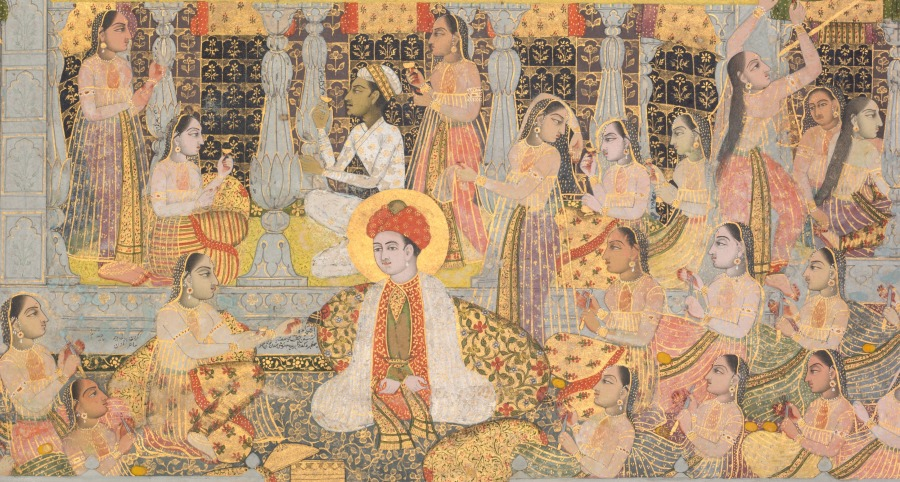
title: Lovers and beloveds: A composite of scenes from Persian, Urdu, and Sanskrit literature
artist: Chitarman II (Indian, c. 1680–с. 1750)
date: c. 1735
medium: Gum tempera and gold on paper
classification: Painting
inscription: Persian inscriptions throughout, in nasta‘liq script: Top left: The celebrated lover Ranjha; Top right, above awning: The notable ladies of the city falling into a swoon having caught sight of Joseph’s beauteous countenance; Top center, on pillar beneath canopy: The celebrated lover Vamiq; On another pillar, behind the woman’s head: The celebrated beloved ‘Azra; Upper left, on pillar: King Nala, the lover; Central figure with halo: The coming from the prison and sitting [in state] of the Lord Joseph the Prophet, with the women of the town cutting the palms of their hands and falling down unconscious; Left of center: [. . . cutting palms . . . wine cups fell from their hands . . . state of wonderment . . .]; Central pavilion at left: Sassi, the beloved the lover [Punnun]; Below central figure of Joseph: The stream of milk Shirin the beloved, weeping The death of Farhad, the lover; Lower right, in front of bearded man: Hafiz of Shiraz; Below his decanter: The stick of candy [referring to the woman with whom, according to popular lore, Hafiz was supposed to have fallen in love as a youth]; Behind the pavilion at right: Bride descending into a grave . . .; On the white railing to the left: Khwaja Bu Ali . . .; Bottom left: Queen Padmavati, the beloved, King Ratnasena, the lover; Bottom right: Majnun, the lover; On page held by Majnun: Say, “He is Allah, who is One, Allah the eternal refuge. He neither begets nor is born, Nor is there to Him any equivalent.” [Qur'an, chapter 112]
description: The figure of Joseph, identified by his halo, sits in the center near the top of this painting of heroes and heroines of ten different Persian, Urdu, and Sanskrit romances. The depicted scene occurs after Joseph has been purchased by Zulaykha in Egypt. Zulaykha, wishing to show him off to her friends and acquaintances, invites them to her home where she supplies oranges and knives. When the women see Joseph, they all are so distracted by his divine beauty that they accidentally cut their hands while peeling their oranges, but remain mesmerized by his appearance. The dramatic scene in the center is from the Persian romance of Khusrau and Shirin, in which Farhad, a stonecutter who loved Shirin, threw himself to his death from a mountaintop after hearing news of Shirin’s death, falsely sent to him from his rival Khusrau. The emaciated Majnun is in the lower right corner. Every vignette has been identified with a tiny Persian inscription.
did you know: Below the bearded poet Hafiz is the woman he loved; her name was Stick of Candy.